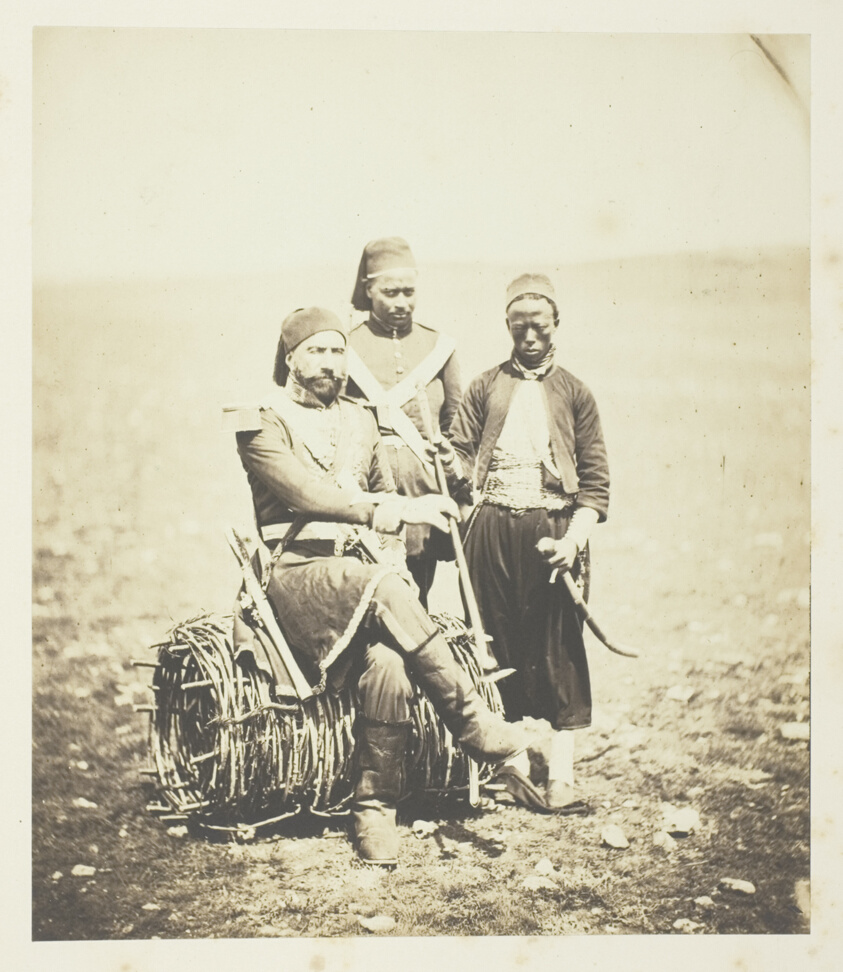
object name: Photograph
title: Ismail Pacha and Attendants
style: 19th century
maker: Roger Fenton (English, 1819–1869)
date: 1855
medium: Salted paper print, plate 52 from the album "Photographs Taken in the Crimea" (1856)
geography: England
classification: salted paper print; photographic process; photography; photograph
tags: Collected by Hugh Edwards, Crimea 1856